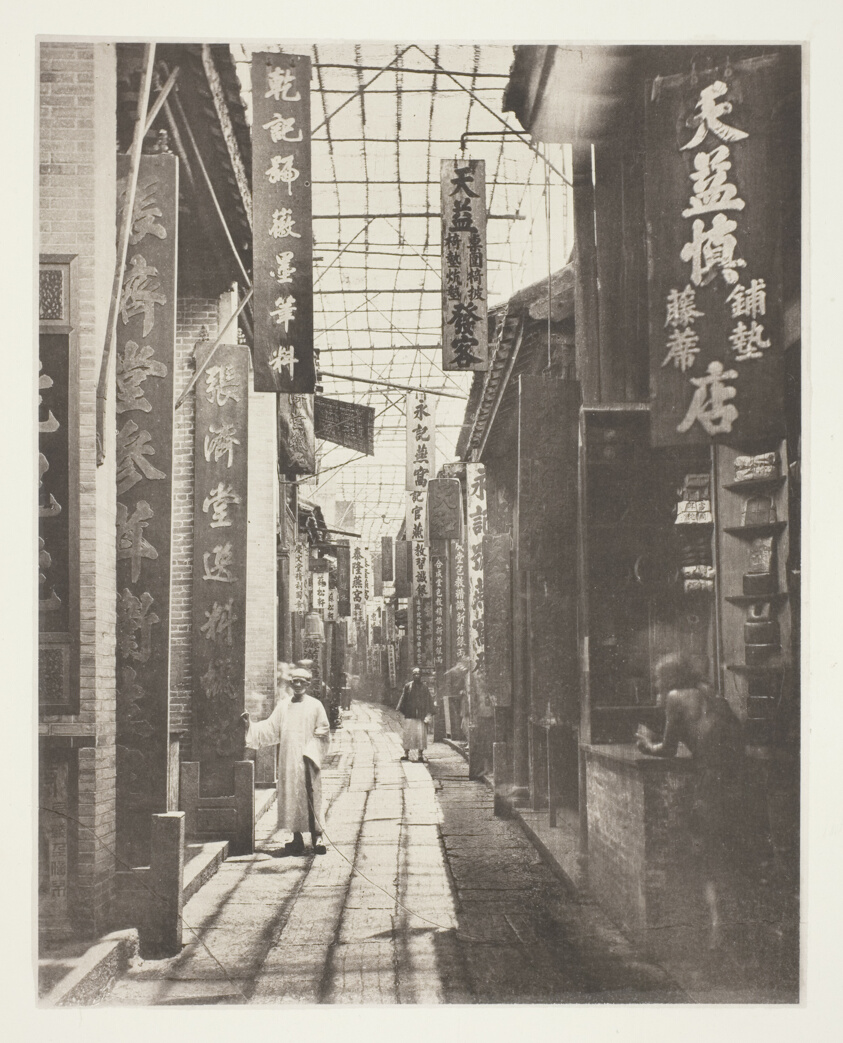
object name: Photograph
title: Physic Street, Canton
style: 19th century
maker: John Thomson (Scottish, 1837–1921)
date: c. 1868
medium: Collotype, pl. XX from the album "Illustrations of China and its People, Volume I" (1873)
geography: Scotland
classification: photography; photograph